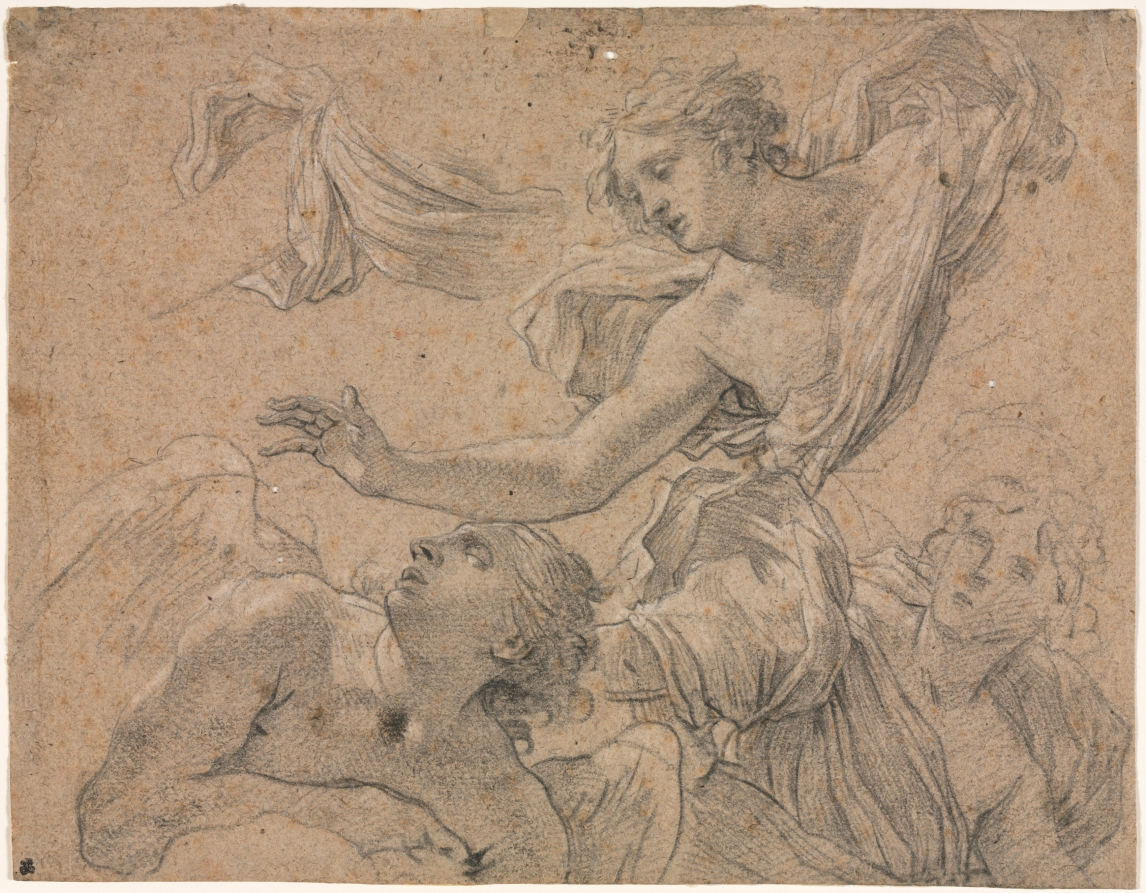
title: Studies of Angels (recto)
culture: France, 17th century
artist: Michel Dorigny (French, 1617–1665)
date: 1655–1660?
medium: black chalk heightened with white chalk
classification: Drawing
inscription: verso, lower left, in graphite: 225911 [sideways]; lower left, in graphite: 302 [underlined] / 1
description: Dorigny was the collaborator and son-in-law of Simon Vouet, the leading painter working in Paris in the mid-1600s. Their drawing styles are similar, and this sheet was once attributed to Vouet. However, the airy, floating drapery, firm contour lines, and regular parallel hatching lines are all typical of Dorigny's technique in black chalk. Although we do not know of a painting to which this drawing relates, the flying angels indicate that Dorigny had a religious subject in mind when he drew them.